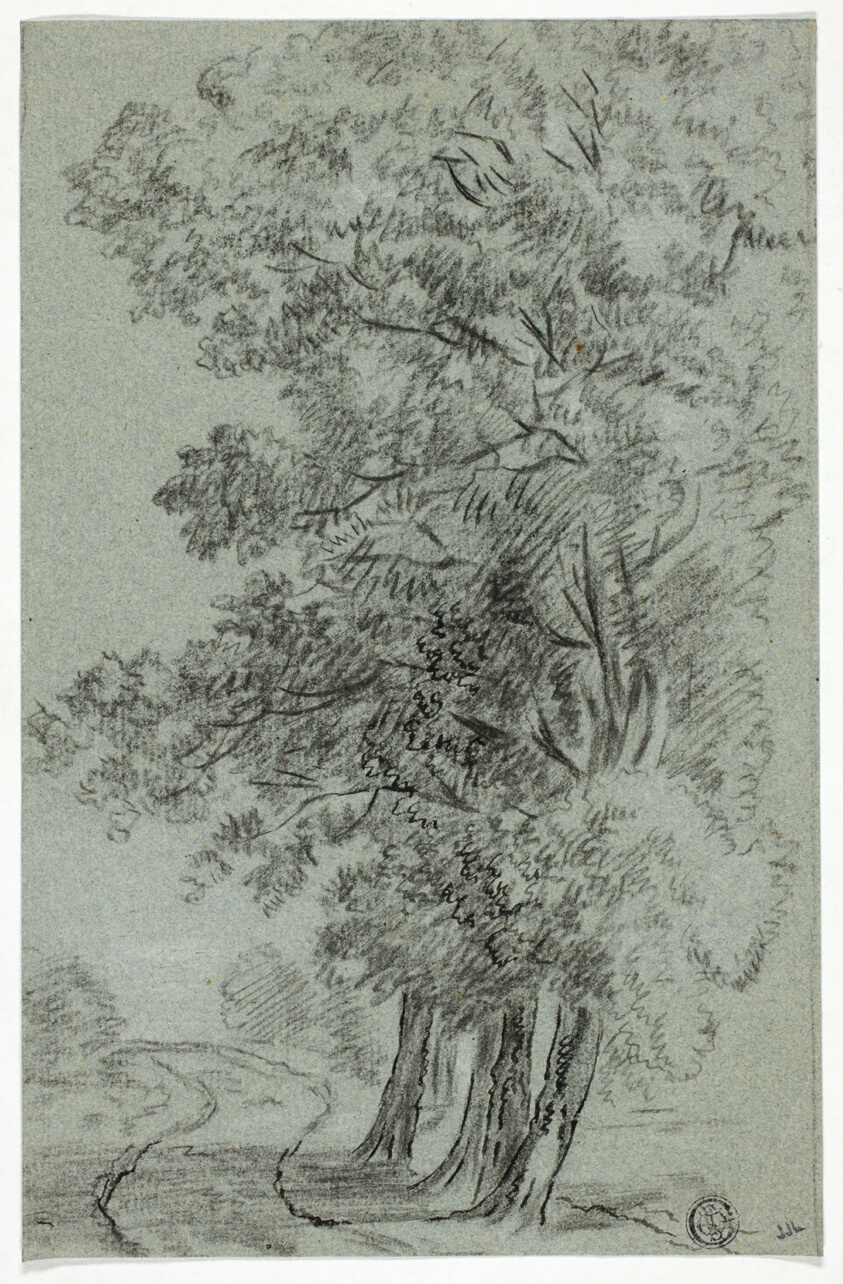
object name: Drawing and Watercolor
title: Road Past Trees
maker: Pieter Gaal (Dutch, 1785-1819)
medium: Pen and black ink, with charcoal, on blue laid paper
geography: Holland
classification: charcoal; drawings (visual works); prints and drawing